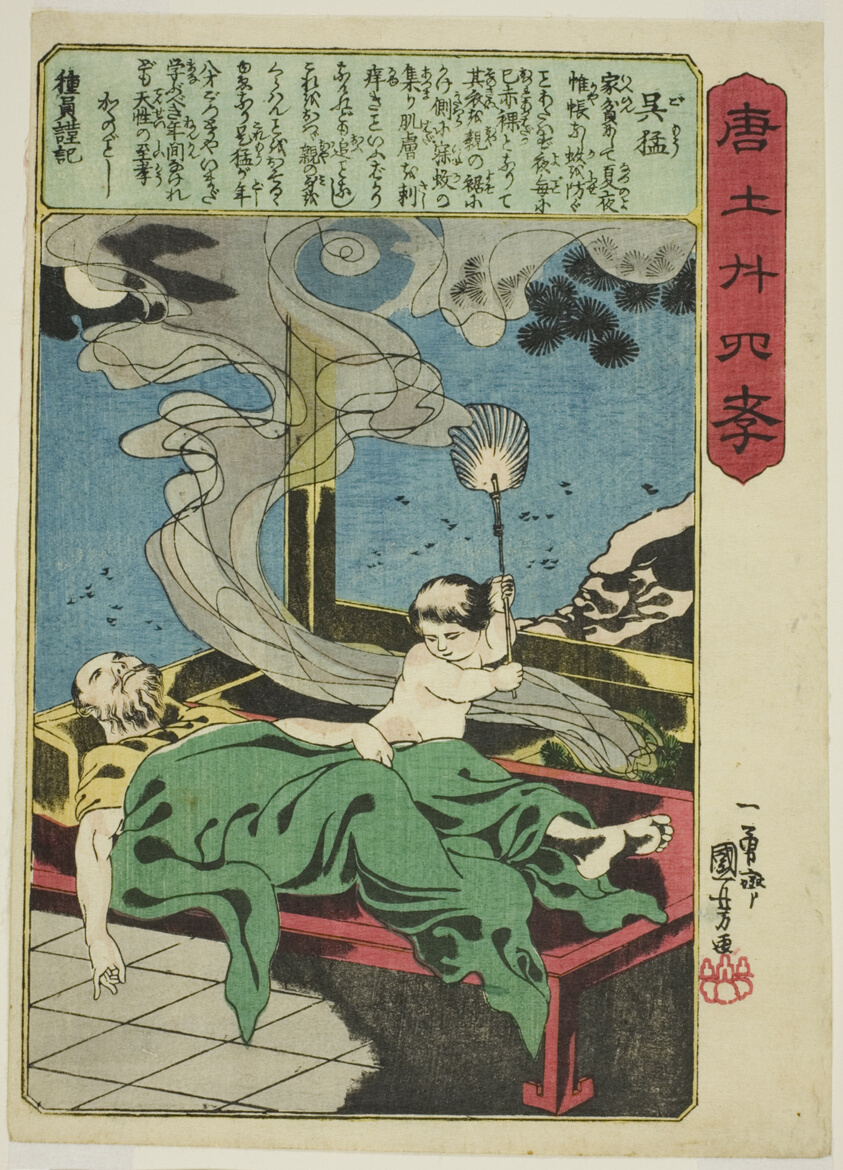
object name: Print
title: Wu Meng (Go Mo), from the series "Twenty-four Paragons of Filial Piety in China (Morokoshi nijushiko)"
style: Japanese (culture or style)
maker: Utagawa Kuniyoshi (Japanese, 1797-1861)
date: c. 1848/50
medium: Color woodblock print; chuban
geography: Japan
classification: woodblock print; print; asian art